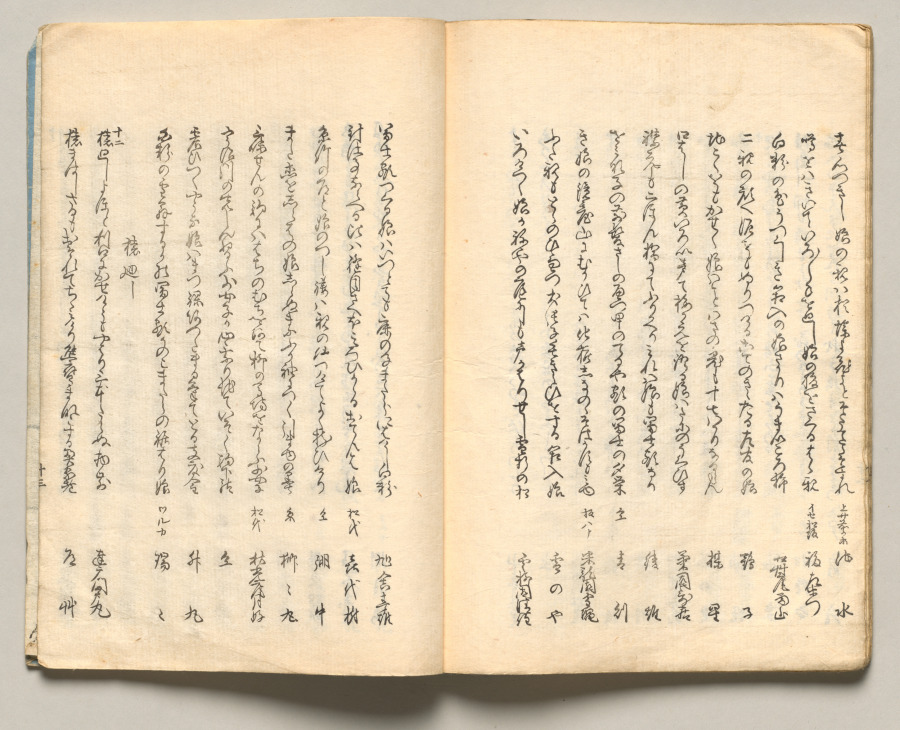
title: Spread Twenty from Volume Six of People of Japan in Light Verse (Kyōka)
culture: Japan, Edo period (1615–1868)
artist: Utagawa Hiroshige (Japanese, 1797–1858)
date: 1857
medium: Woodblock-printed book; ink and color on paper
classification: Bound Volume